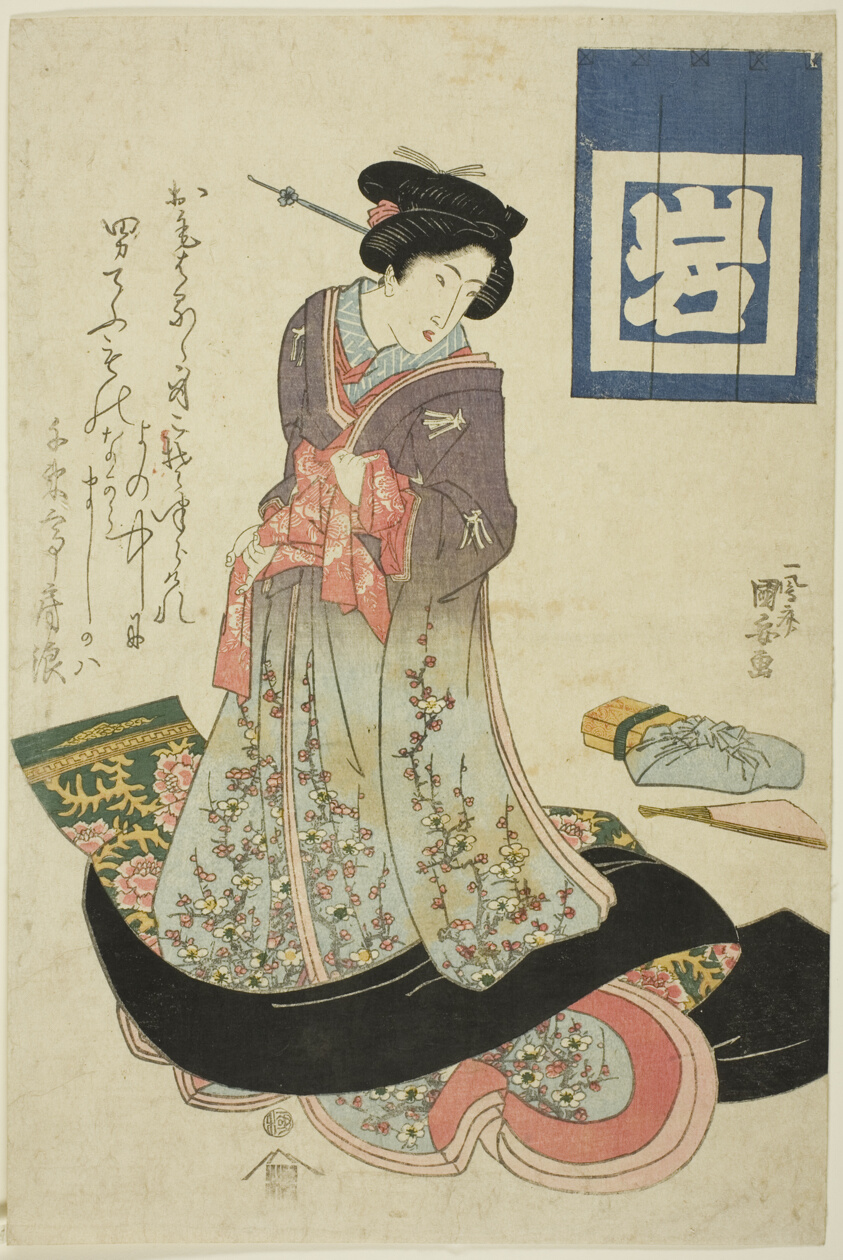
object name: Print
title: Beauty representing spring, from an untitled series of beauties representing the four seasons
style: Japanese (culture or style)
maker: Utagawa Kuniyasu (Japanese, 1794-1832)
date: c. 1818/30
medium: Color woodblock print; oban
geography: Japan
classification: print; asian art